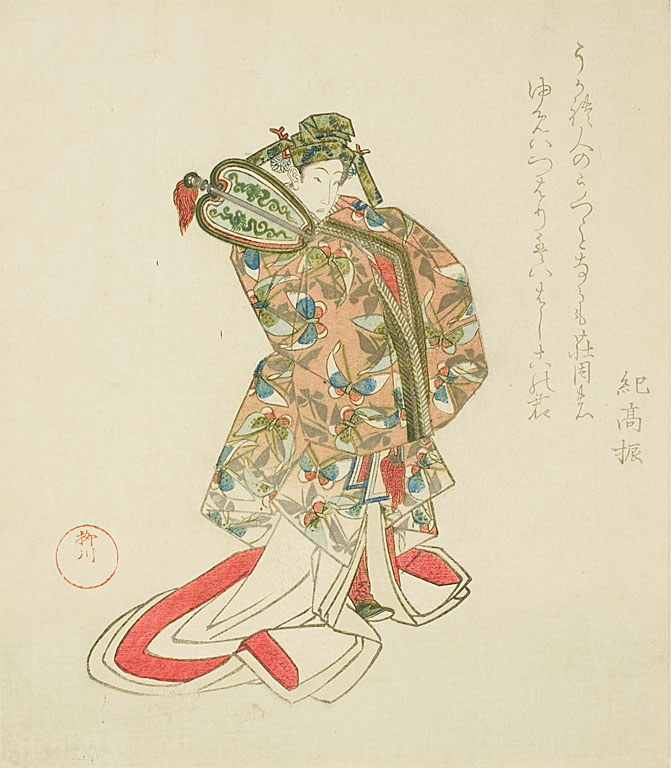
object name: Print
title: Surimono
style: edo (japanese period), Japanism, East Asian, asian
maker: Anonymous; Japanese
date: Edo period (1603–1867)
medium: Color woodblock print; surimono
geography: Japan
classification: woodblock print; print; asian art